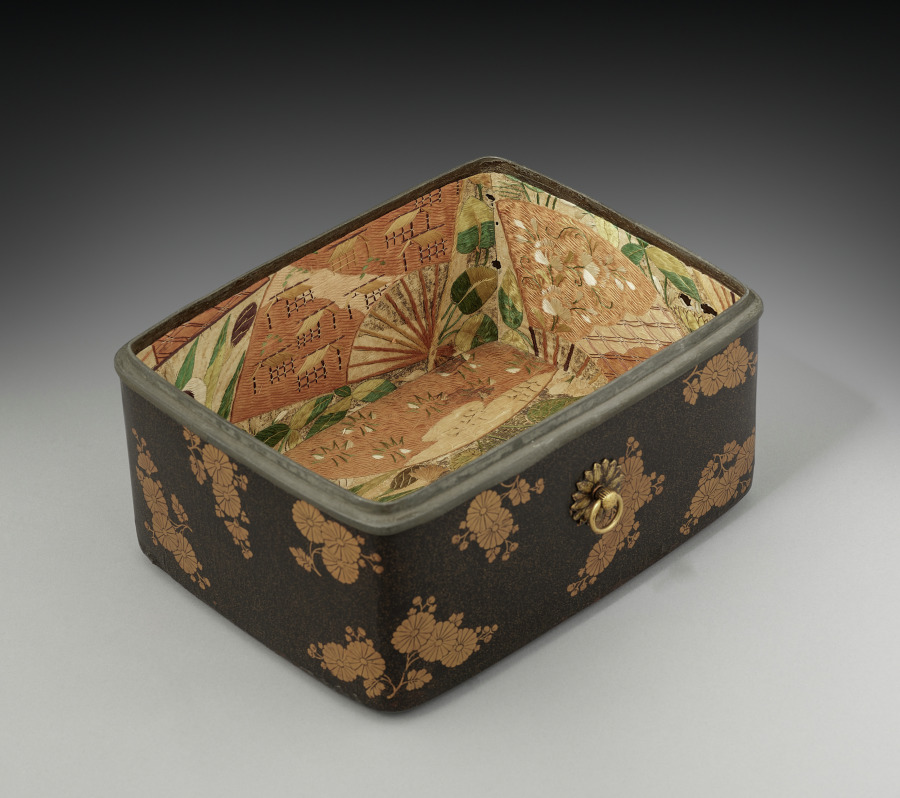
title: Cosmetics Box with Chrysanthemums (base)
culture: Japan, Kamakura period (1185–1333)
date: early 1300s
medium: lacquer on wood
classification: Lacquer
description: In China, the chrysanthemum was historically appreciated for its association with the Double Nine Festival and the reclusive life of the poet Tao Yuanming (AD 365-427). In Japan, the 16-petaled chrysanthemum came to symbolize the Japanese imperial family after Emperor Gotoba (1180-1239) chose the motif as his personal emblem, having it applied to his sword and everyday utensils. This box proves that the flower also appeared on lacquer wares as early as the Kamakura period.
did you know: In Japanese, this type of small box is called a tebako, literally a hand box, and was typically part of a cosmetics set.